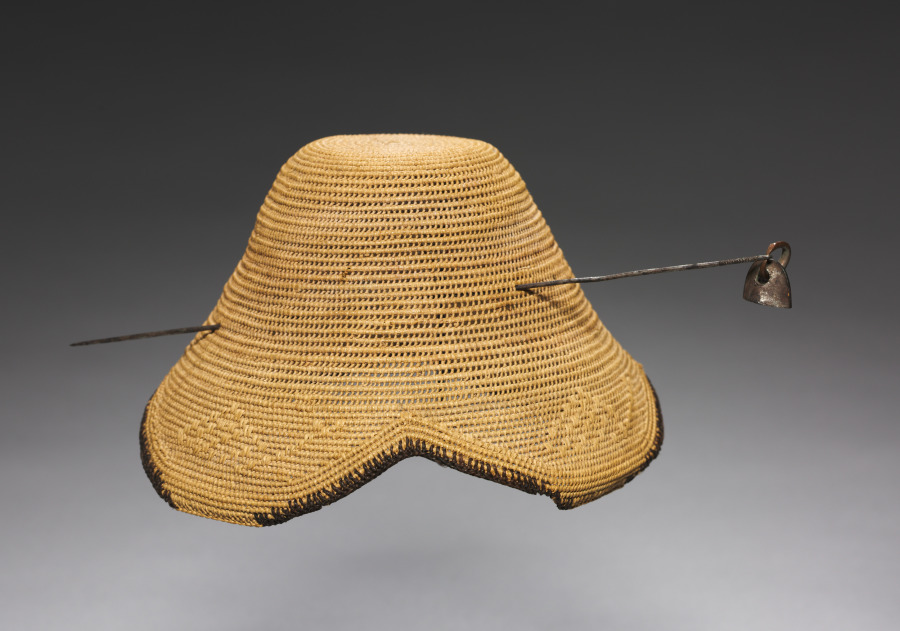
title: Hat (laket)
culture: Africa, Central Africa, Democratic Republic of the Congo, Kuba-style maker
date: early 1900s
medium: Raffia and dye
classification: Garment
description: Titled Kuba men and prominent women wear the laket, a small ornate dome-shaped hat. An essential fashion item of adult men in good social standing, it focuses special attention on the head as a significant marker of individual identity, ethnic affiliation, status, and role in society. This prestige object is secured on the crown of the head with a nine-and-a-half-inch metal pin that pierces through the hat onto a clump of hair. This laket is made from raffia palm fiber coiled into threads and woven in different patterns. There are two examples of the laket: the plain type with the flat top, and the more elaborate type called the laket mishiing.